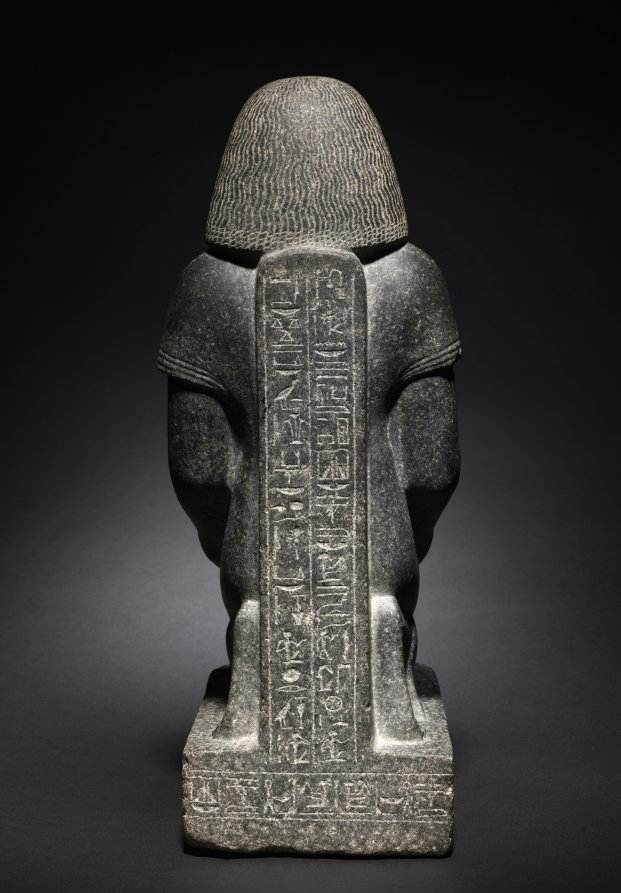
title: Statue of Minemheb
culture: Egypt, New Kingdom (1540–1069 BCE), Dynasty 18, reign of Amenhotep III (1390–1352 BCE)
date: c. 1391–1353 BCE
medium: granodiorite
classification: Sculpture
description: Minemheb was one of the many court officials who helped prepare for Amenhotep III's 30-year jubilee festival. Clearly, Minemheb regarded this as the high point of his career, since his title as chief of construction for the jubilee temple is the primary one provided on this statue. It is actually a statue within a statue: Minemheb kneels to present a small altar, upon which squats a statue of the god Thoth in baboon form. Carved in extremely hard stone, Minemheb's statue is nonetheless carefully detailed and superbly modeled. Special attention was given to the rendering of the baboon's face. The heavy-lidded eyes and furrowed brow give the animal an almost contemplative expression.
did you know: The baboon in this sculpture is the god Thoth in one of his animal forms.